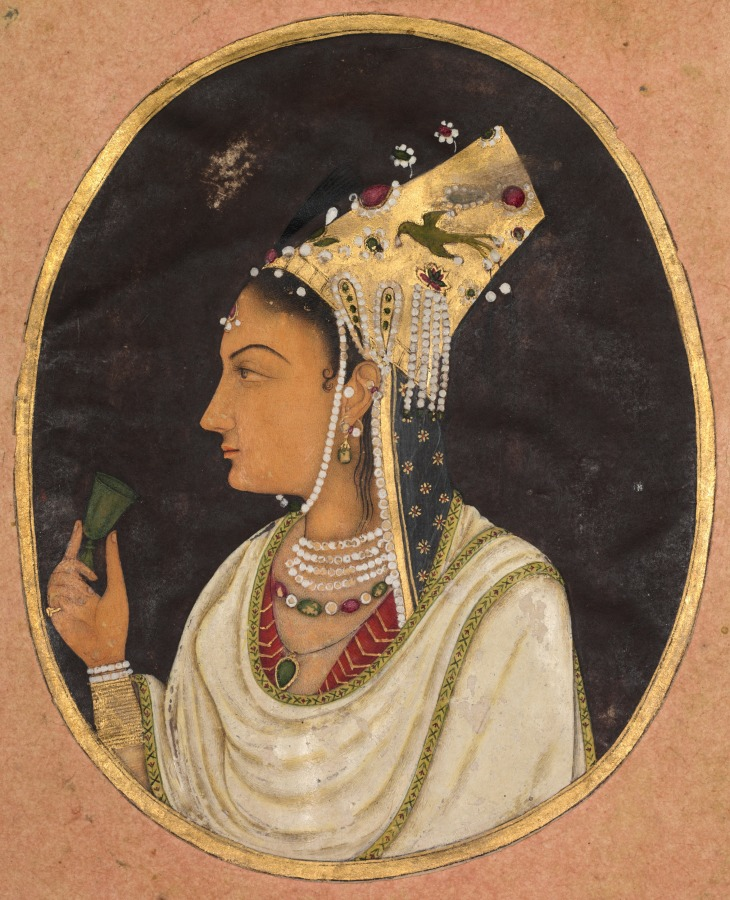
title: Oval portrait of a woman in a Chaghtai hat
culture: India, Mughal, 18th century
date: c. 1740–50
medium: Gum tempera and gold on paper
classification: Painting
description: The tall, flat-topped hat is an element of the native dress of the Mughals from eastern Uzbekistan. Of mixed Turkic and Mongol ethnicities, they spoke a Turkic language known as Chaghatai. Chaghatai refers to the name of the son of the Mongol Chingiz (Genghis) Khan, who ruled this area of Central Asia from 1246 to 1282. This woman’s hat has been studded with jewels and strings of pearls. The portrait jewel format that was once reserved for the emperor has now been expanded to include ladies of the court. The woman holds a jade wine cup and wears a draped upper garment with a woven or embroidered border similar to the fragment on display at the left.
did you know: She holds a delicate jade cup of the type for which the Mughals were famous.